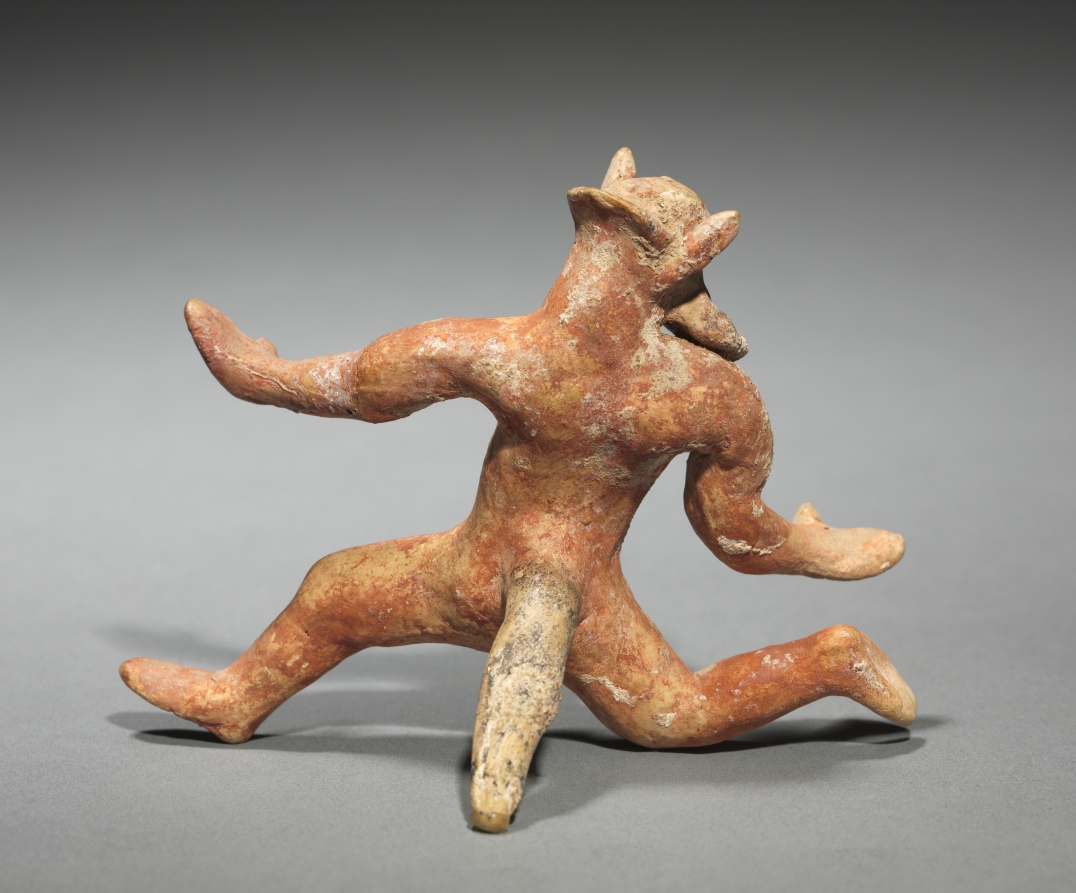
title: Dancing Satyr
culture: Greece, Boeotia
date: 500–475 BCE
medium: painted terracotta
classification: Sculpture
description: Part man and part beast, satyrs were mythical woodland creatures. In art, they were depicted with the ears and tail of a goat or horse, sometimes with hooves, and in a high state of sexual arousal. Satyrs often accompanied Dionysus, the god of wine, in his drinking bouts and other escapades. These three probably once decorated the rim of a large punch-bowl-shaped vessel for serving wine.